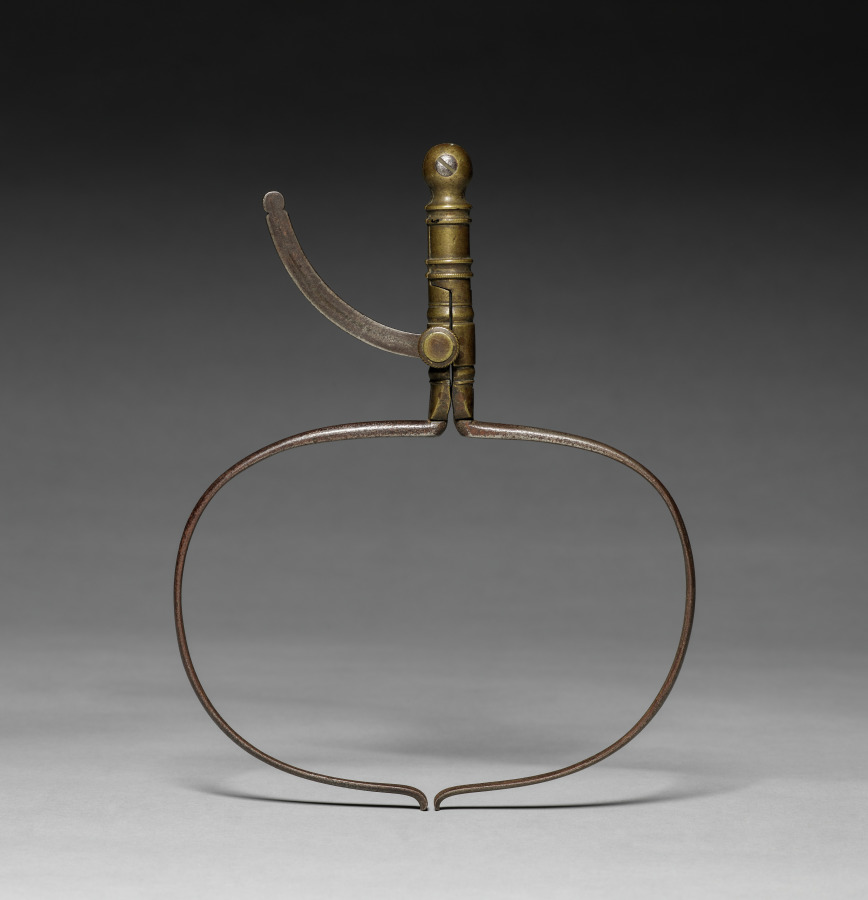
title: Inside Calipers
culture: Europe, 18th century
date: 1700s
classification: Tool